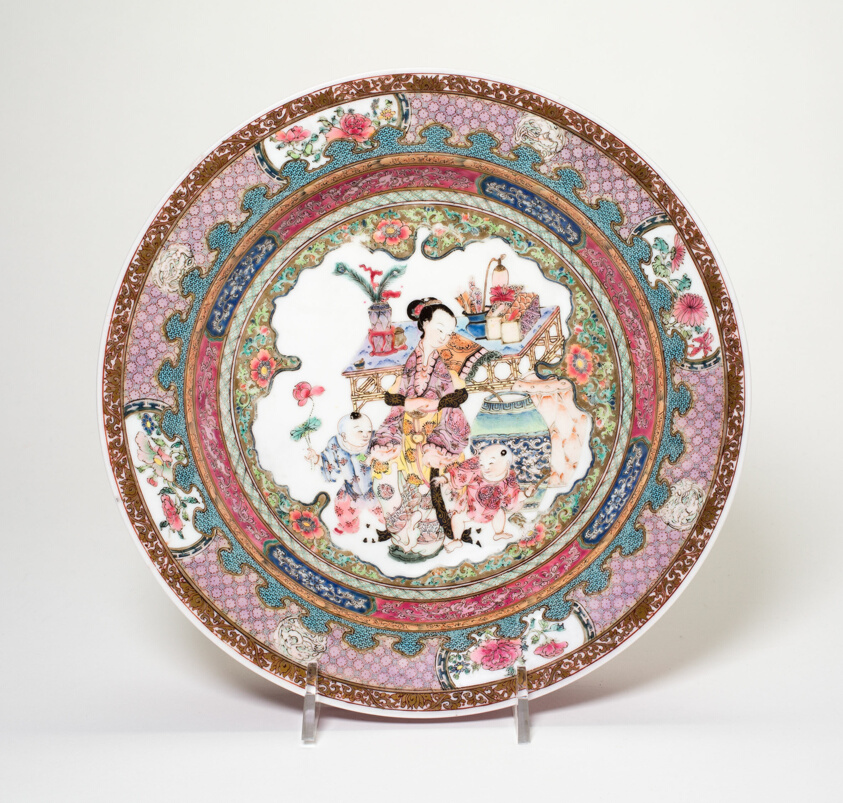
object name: Vessel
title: Ruby-Back Famille-Rose Dish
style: Chinese (culture or style)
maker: China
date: Qing dynasty (1644–1911), Yongzheng period (1723–1735)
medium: Porcelain with overglaze famille rose enamel decoration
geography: China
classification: dish (vessel); ceramics; vessel